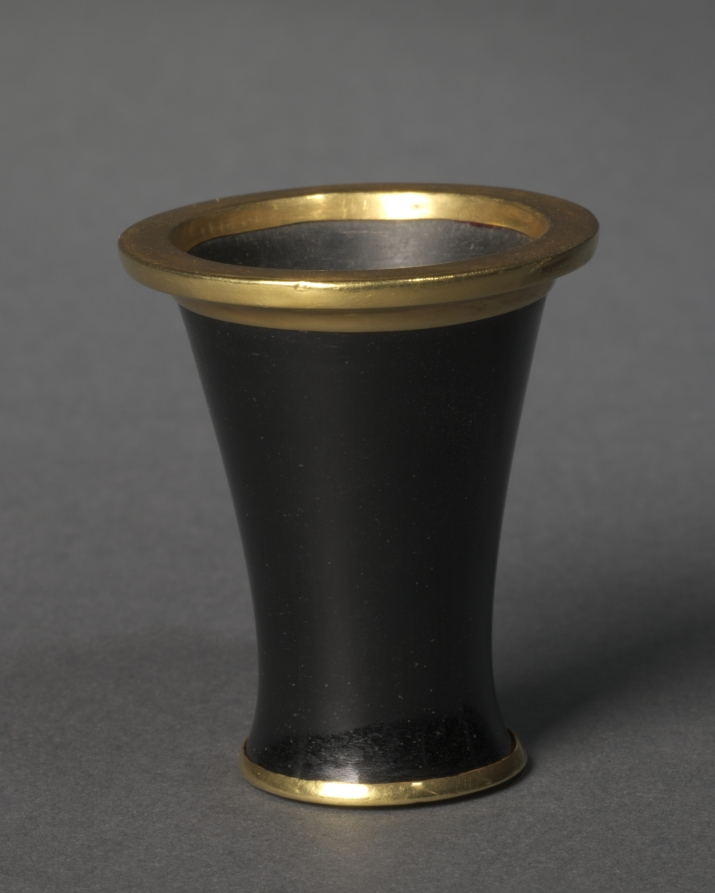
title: Cosmetic Vessel (Beaker)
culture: Egypt, Middle Kingdom (2040–1648 BCE), Dynasty 12, reign of Amenemhat III (1860–1814 BCE)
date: c. 1859–1814 BCE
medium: obsidian and gold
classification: Vessels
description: Both ancient Egyptian men and women loved cosmetics. Unguents, oils, and perfumes made from aromatic plant resins and gums were obtained at great cost from distant lands. The objects identified with cosmetics were given lavish treatment. This luxurious obsidian and gold beaker hints at the precious contents it once held.